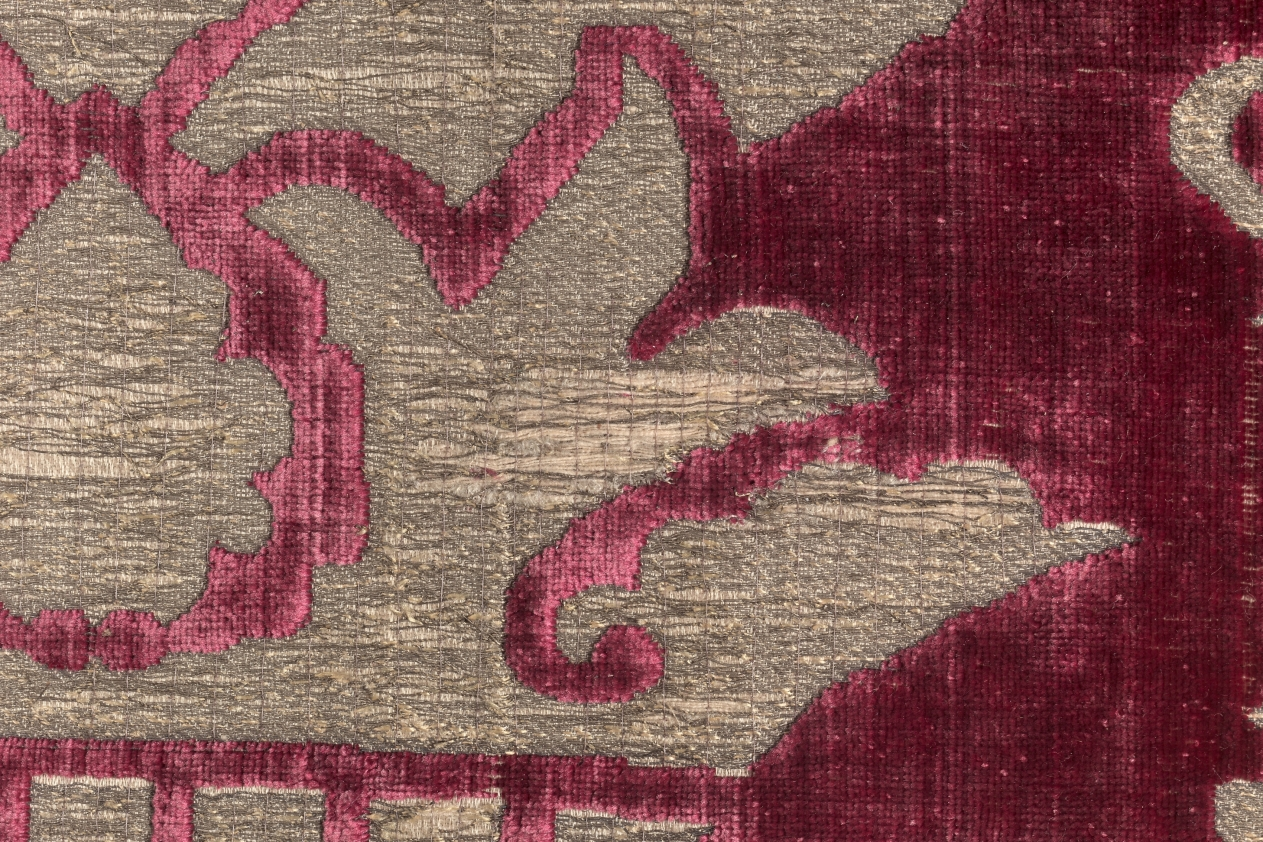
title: Brocaded Velvet Panel with Italianate Pattern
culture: Turkey, Istanbul or Bursa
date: 1575–1625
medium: Silk: velvet, brocaded; gilt-metal thread and cotton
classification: Velvet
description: Rarely are four fabric widths preserved together from any culture. This gilt-metal thread pattern combines Turkish and Italian features: the large ogival (curved) lattice clasped by crowns and the velvet structure are Turkish, and the two so-called artichoke designs are enlarged adaptations of Italian motifs. A symbol of wealth and power, this velvet panel was woven during the artistic height of the Ottoman Empire in the late 1500s. It may have covered a divan (sofa) or possibly enhanced a wall during cold winters in the imperial Topkapi Palace in Istanbul.